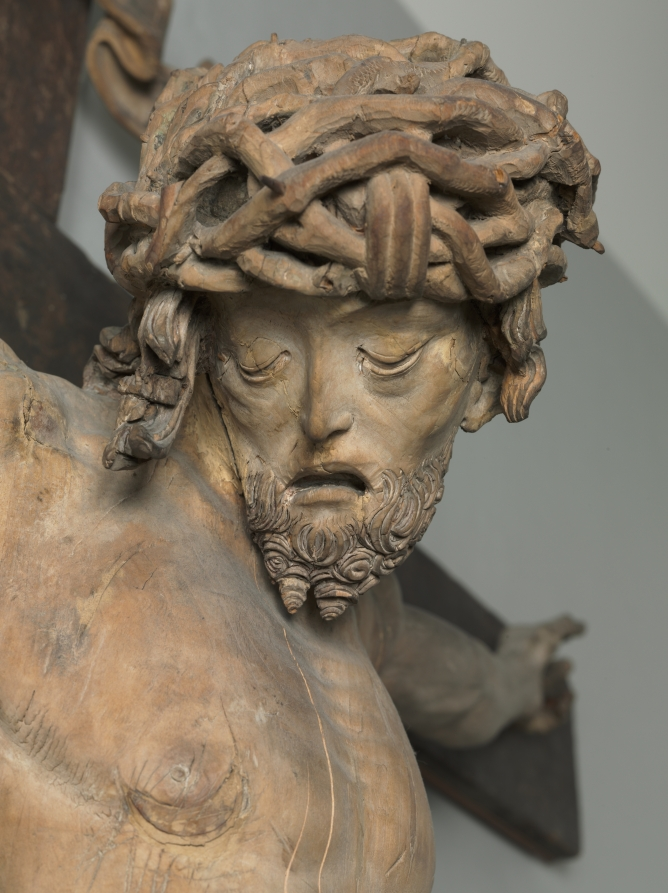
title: Crucified Christ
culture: Germany, Landshut, 16th century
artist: Hans Leinberger (German)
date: c. 1525–1530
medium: lindenwood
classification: Sculpture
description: This sculpture is possibly the best of several crucifixes by this famous sculptor from the Bavarian town of Landshut on the Upper Danube. The pathos and graphic realism with which the artist has modeled the body of Christ ranks this sculpture as one of the artist’s finest works. Leinberger was, along with Matthäus Krennis, an outstanding exponent of the late Gothic style pervasive throughout the Upper Danube area of southeastern Germany during the first decades of the 1500s. This sculpture was probably suspended over the main altar of a church whose origins have not been identified.